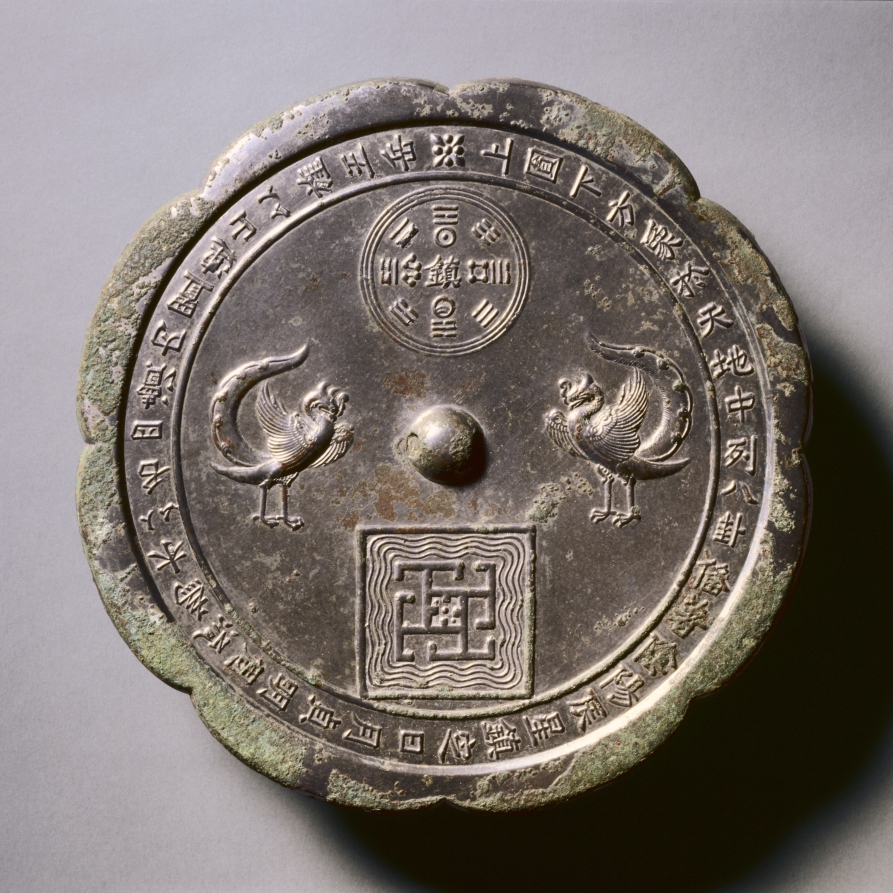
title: Lobed Mirror with Heaven and Earth between the Paired Phoenixes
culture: China, Tang dynasty (618-907)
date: mid to late 700s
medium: bronze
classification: Metalwork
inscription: 上圓下方，象于天地。 中列八填，備著陰陽。 辰星鎮定，日月貞明。 周流為水，以名四瀆。 內置連山，以旌王岳。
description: This mirror bears an important inscription as well as symbolic imagery of the Eight Trigrams and Heaven and Earth to express the ancient Chinese cosmological ideas. The inscription reads: Circle above and square below: These are symbolic of heaven and earth. In the middle are the Eight Trigrams. Making clear [the forces of] yin and yang. Stars and constellations are well aligned; The sun and the moon are virtuous and bright. Circulating around [the earth] is water, Giving identity to the Four Great Rivers. Within are the mountain ranges, To signify the lordly heights.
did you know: This mirror contains cosmological symbolism with heaven represented by a large circle at top and earth by a square at bottom.